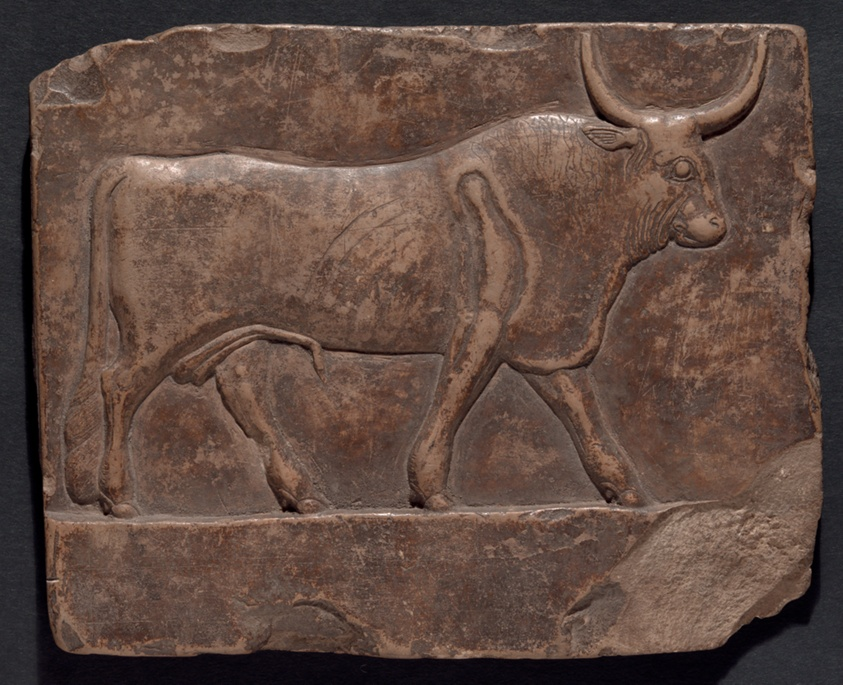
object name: Architectural fragment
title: Relief of a Bull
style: ptolemaic, egyptian, ancient, greco-roman (egyptian)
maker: Egyptian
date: Early Ptolemaic Period, about 300 BCE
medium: Limestone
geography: Egypt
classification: plaque (flat object); stone; sculpture; ancient art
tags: bull, animals, bulls